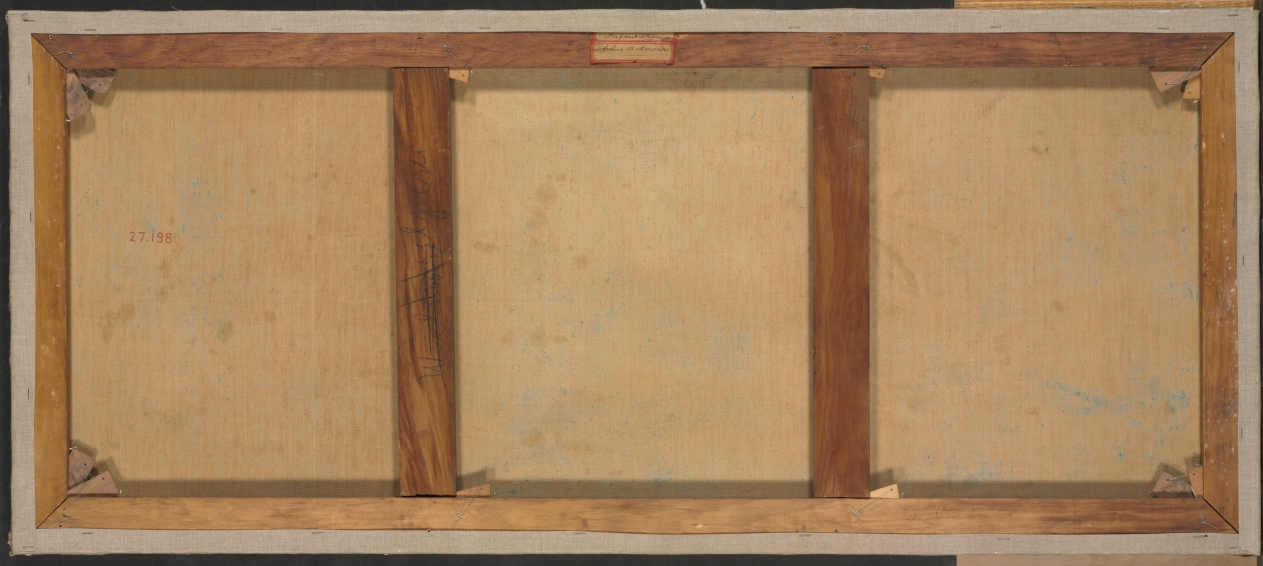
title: Hermes and the Infant Dionysus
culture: America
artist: Arthur B. Davies (American, 1862–1928)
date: 1900–1915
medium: oil on canvas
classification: Painting